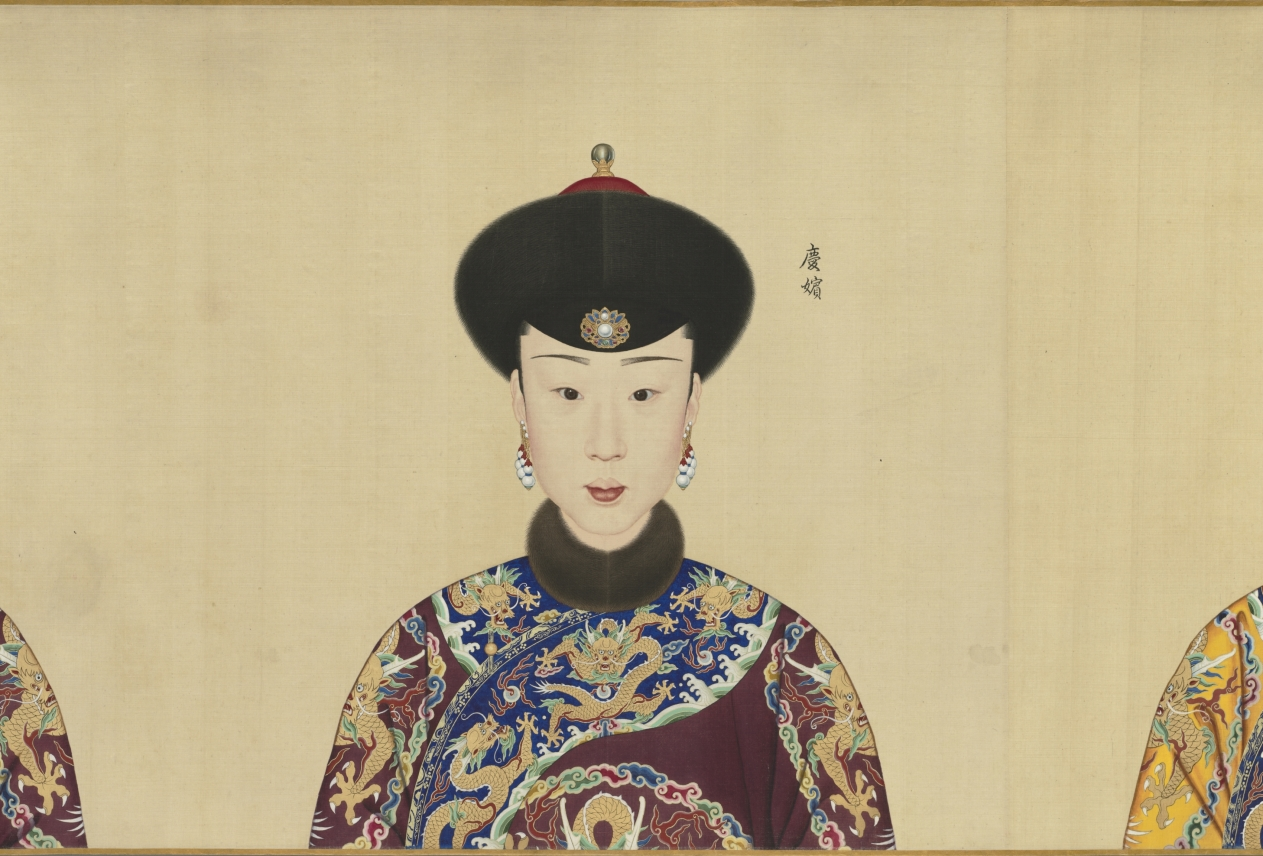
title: Portraits of the Qianlong Emperor and His Twelve Consorts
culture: China, Qing dynasty (1644–1911), Qianlong reign (1736–95)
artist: Giuseppe Castiglione (Italian, 1688–1766)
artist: and others (Chinese)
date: 1736–70s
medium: Handscroll; ink and color on silk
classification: Painting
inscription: 9 seals of the Qianlong emperor (r. 1736–95).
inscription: The eighth month, first year of Qianlong [1736] 乾隆元年八月吉日. The Empress (Xiaoxian) 皇后 (1712–1748), The Guifei (Huixian) 貴妃 (?-–1745), Chunfei 純妃 (1713–1760), Jiafei 嘉妃 (?–1755), Lingfei 令妃 (1727–1775), Shufei 舒妃 (1728–1777), Qingbin 慶嬪 (1724–1774), Yingbin 穎嬪 (1731–1800), Xinbin 忻嬪 (?–1764), Dunfei 惇妃 (1746–1806), Xunfei 順妃 (1749–1788), Shunbin 循嬪 (?–1797).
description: This portrait shows the Qianlong emperor at 26, in the first year of his reign. His likeness is followed by portraits of the empress and eleven consorts. Their portraits document the appearances of the court women around the time when they received their respective imperial titles, which occurred at different stages of the emperor's life. The first three portraits were done by the Jesuit (Roman Catholic) missionary artist Giuseppe Castiglione, whereas the later ones were by Chinese court painters. Formal portraiture contributed to the affirmation of status and construction of role and identity. This scroll served as both familial documentation and a "mind picture" of the Qianlong emperor, suggesting that his constructed image of emperorship was inseparable from concepts of self and family. It was stored in a carved red lacquer box bearing the original painting title Mind Picture of a Well-Governed and Tranquil Reign (see CMA 1969.32).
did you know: Lingfei 令妃 (1727–1775), the first consort depicted in the maroon or “incense-colored" 香色 robe, was the mother of six of Qianlong’s children, including the future Emperor Jiaqing.